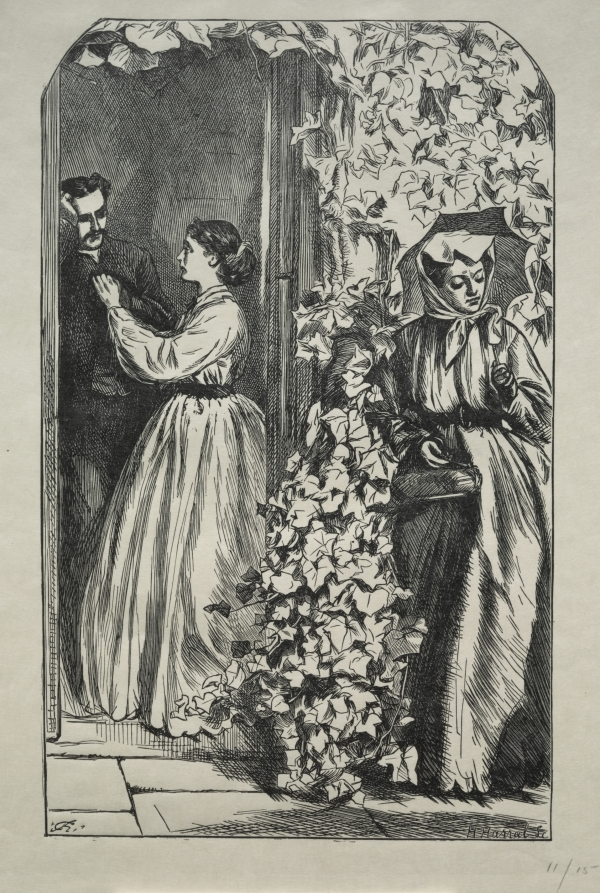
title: What Came of Killing a Rich Uncle One Christmas Time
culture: England, 19th century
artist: Horace Harral (British, 1817–1905)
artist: after Charles Samuel Keene (British, 1823–1891)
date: 1865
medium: wood engraving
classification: Print